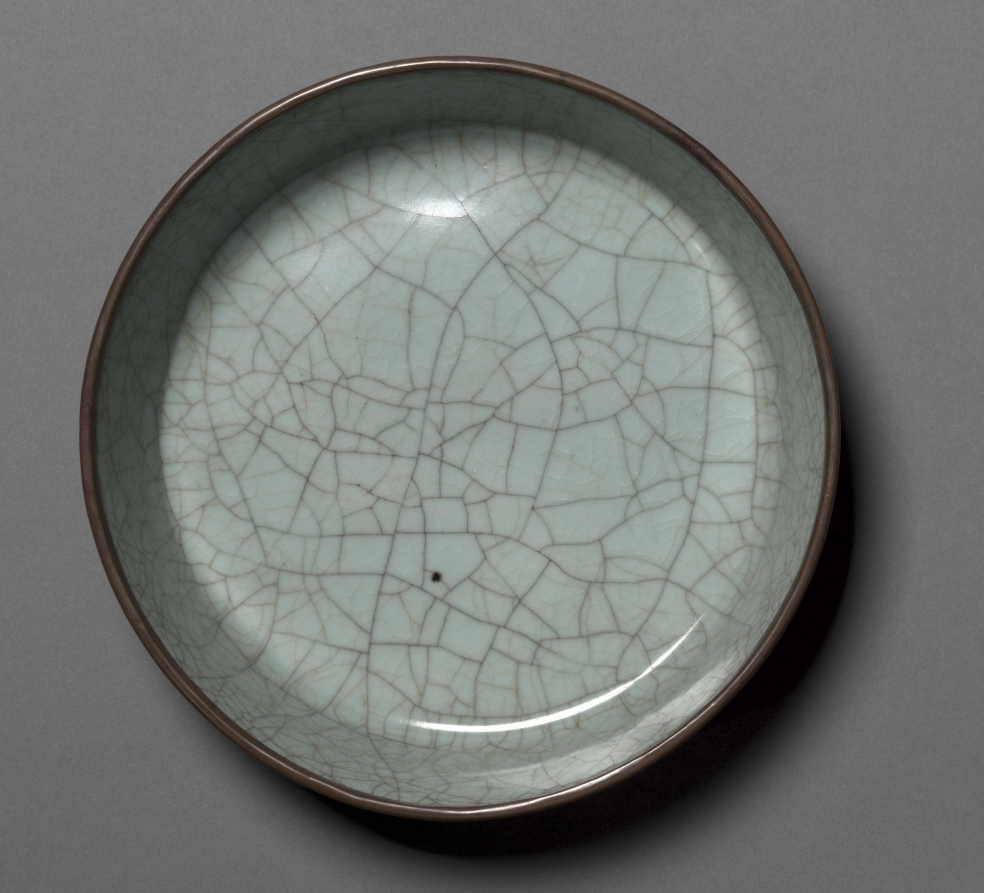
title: Basin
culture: China, Zhejiang province, Hangzhou, Southern Song dynasty (1127-1279)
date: 1127–1279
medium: porcelaneous stoneware, Guan ware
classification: Ceramic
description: Guan ware was the official ware fired at the Southern Song imperial kilns in Hangzhou. Multiple glazing is characteristic of this ware. The total thickness of the glaze can be greater than the clay body that supports it. Here, the thick gray-green glaze is webbed with a wide network of dark brown crackles as well as finer webs of light golden-brown and colorless crackles. The crackle pattern was developed after firing, due to the different rates of expansion and contraction of the body and the glaze. It was consciously exploited to achieve an aesthetic effect and was stained at different stages during the cooling process.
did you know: The base shows that the basin was fired on 17 small spurs arranged in two concentric circles.